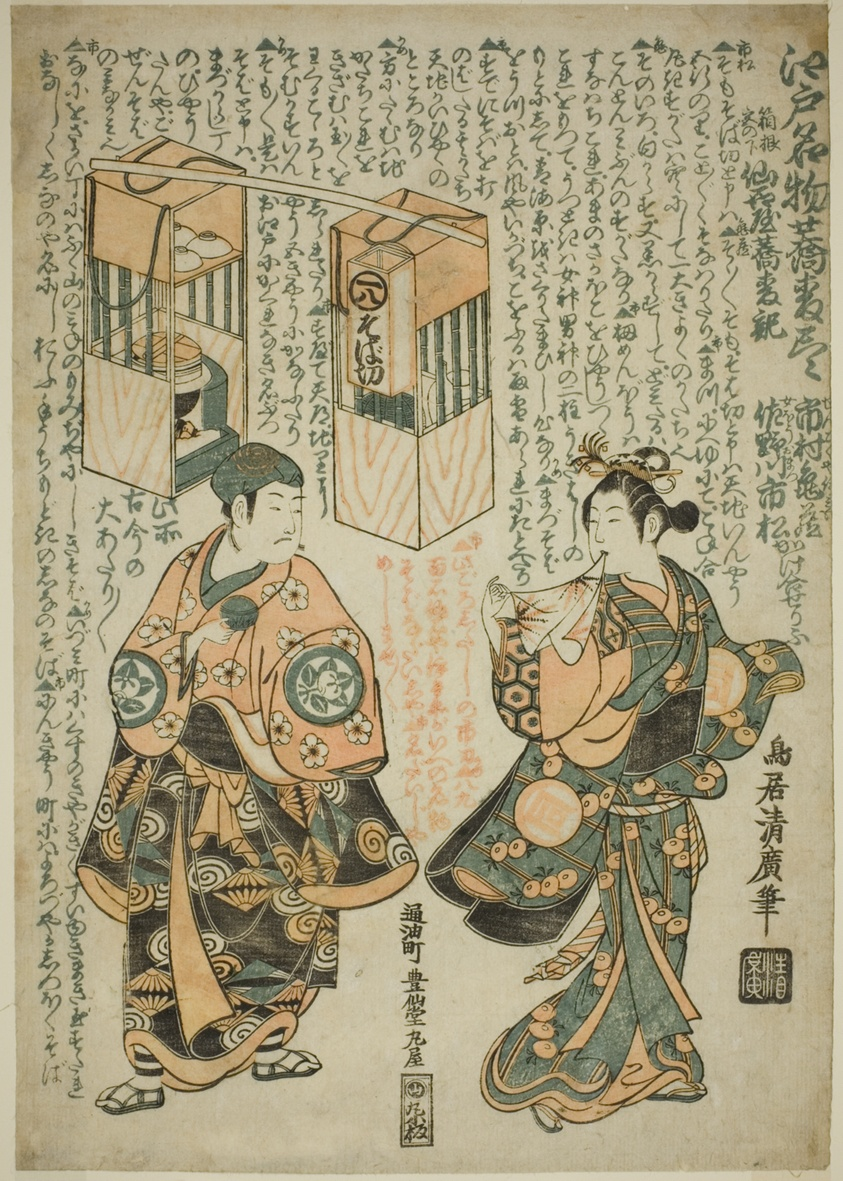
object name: Print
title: The Actors Ichimura Kamezo I as Sengokuya Ihei and Sanogawa Ichimatsu I as his wife Omatsu in the play "Kashiwa ga Toge Kichirei no Sumo," performed at Ichimura Theater in the eleventh month, 1755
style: Japanese (culture or style)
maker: Torii Kiyohiro (Japanese, active c. 1737-76)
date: 1755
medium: Color woodblock print; oban, benizuri-e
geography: Japan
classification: woodblock print; print; asian art